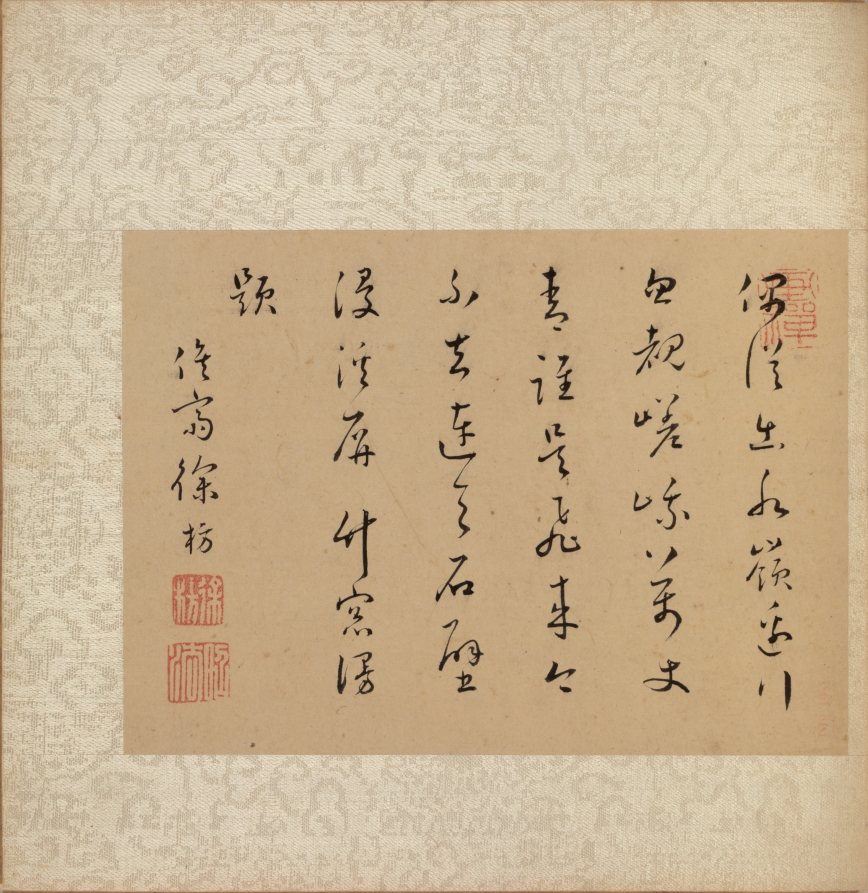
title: Album of Miscellaneous Subjects, Leaf 4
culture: China, Qing dynasty (1644-1911)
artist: Fan Qi (Chinese, 1616–after 1694)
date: early 1650s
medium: album leaf, ink and color on silk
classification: Painting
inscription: Artist seal: Fan Qi 樊圻. Poem by Xu Fang 徐枋 (1622–1694): By chance, I start my journey from the watershed to remote regions,/ Suddenly I sight the silhouette of mountains - myriad expanses of green./ What is this "Come-flying" Peak which now does not recede,/ Its rocky walls, linked to heaven, are drenched by a waterfall.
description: The fourth painting by Fan Qi alludes to Wang Wei's poetic lines: In empty hills, there is no one there; Yet one can hear the sound of conversation. The calligraphic colophon by Xu Fang adjacent to the painting reads: By chance, I start my journey from the watershed to remote regions, Suddenly I see the silhouette of mountains, myriad expanses of green. What is this Feilai Peak which now does not recede? Its rocky walls, linked to heaven, are drenched by a waterfall.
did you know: There is no sign of human presence in this sunny landscape dominated by a bold flat-topped cliff.